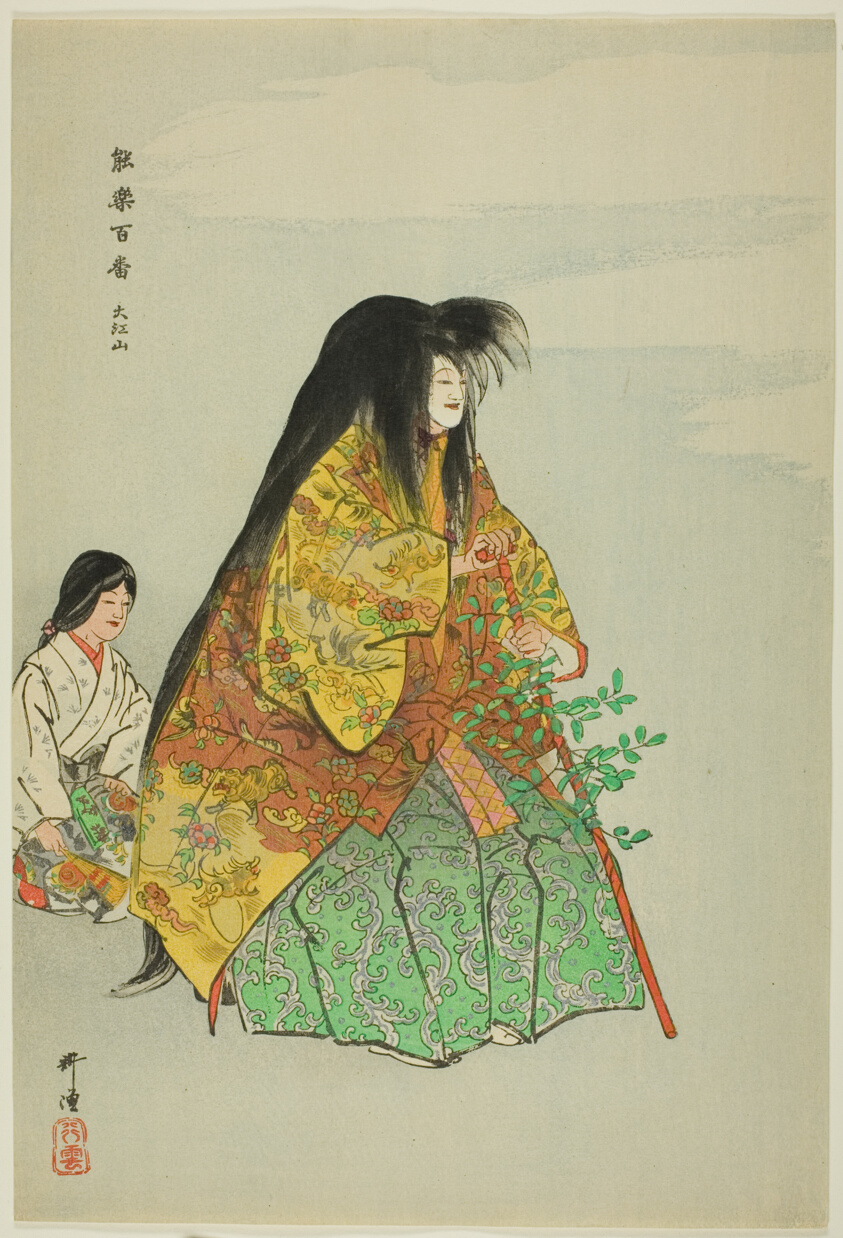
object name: Print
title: Oeyama, from the series "One Hundred No Dramas (Nogaku hyakuban)"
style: Japanese (culture or style)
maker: Tsukioka Kogyo; Japanese, 1869-1927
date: 1898/1903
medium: Color woodblock print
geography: Japan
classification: woodblock print; print; asian art